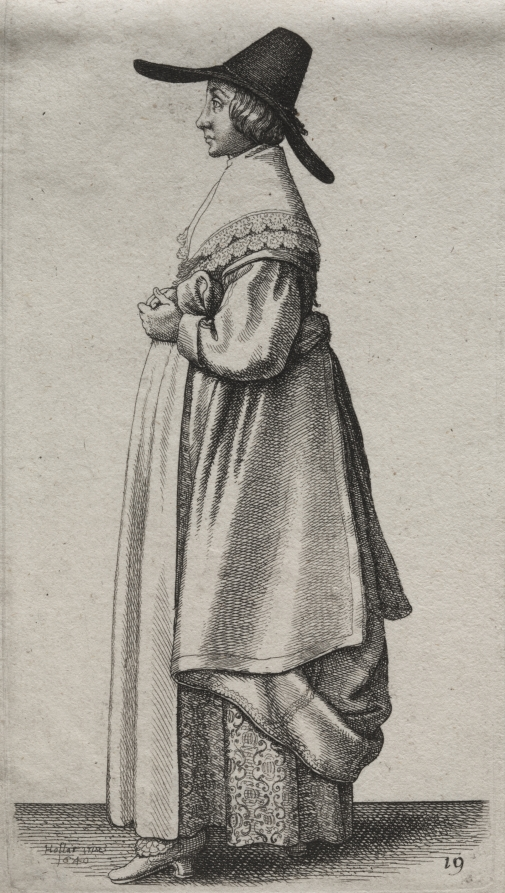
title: The Several Habits of English Women, from the Nobility to the Country Women as they are in these times: The Woman with a Mannish Hat and Flowered Petticoat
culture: Bohemia, 17th century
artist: Wenceslaus Hollar (Bohemian, 1607–1677)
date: 1640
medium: etching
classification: Print